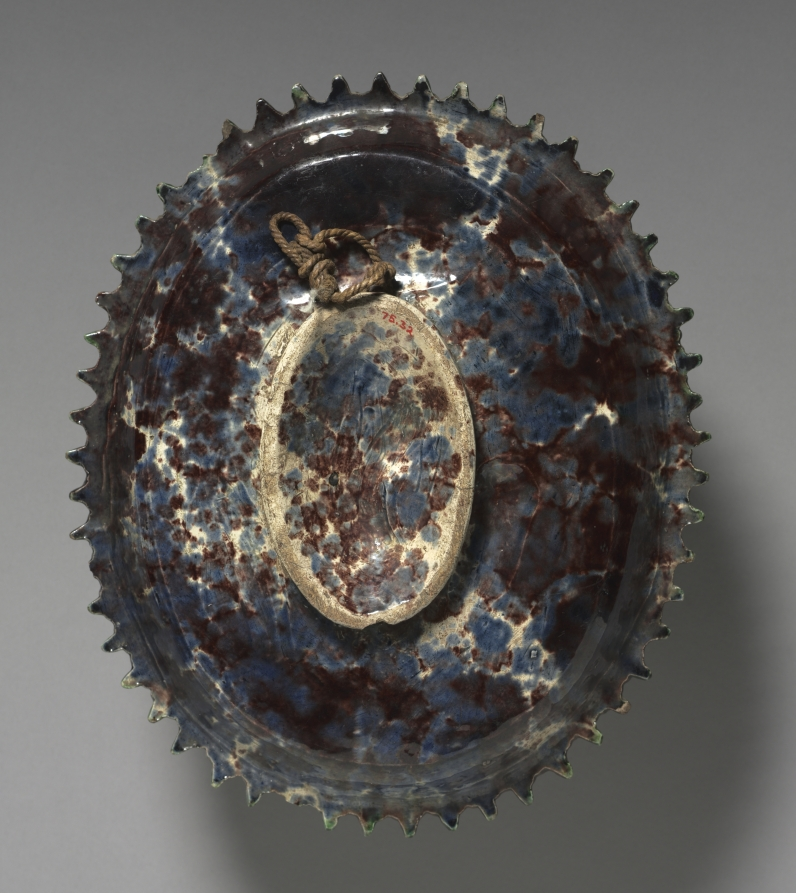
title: Plate: The Sacrifice of Isaac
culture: France, 16th century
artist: circle of Bernard Palissy (French, 1510–1589)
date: late 1500s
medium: lead-glazed earthenware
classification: Ceramic